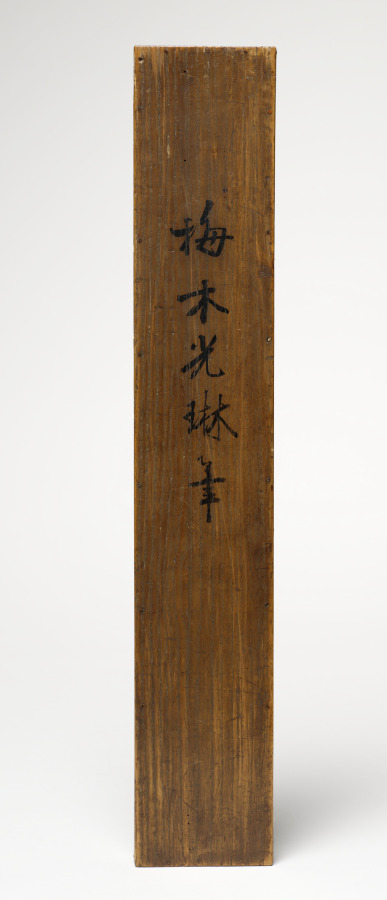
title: Plum Tree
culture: Japan, Edo period (1615–1868)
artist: Ogata Kōrin (Japanese, 1658–1716)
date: c. 1700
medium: hanging scroll; ink on silk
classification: Painting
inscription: Artist's signature and seal above hillock bottom right corner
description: Ogata Kōrin had to think through his design carefully to create these white plum blossoms and deliver their effect, as he used the reserve technique—where selected areas of the painting surface are left unpainted—to achieve it. He probably roughed in the tree before applying an ink wash to the entire silk surface, except where he intended to place the flowers. He likely then returned to articulate the petals and, in some cases, the pistils and stamens. The composition shows the tree twisting out of view, only to return with a branch of new growth jabbing forth from an old, broken limb, thereby heightening the visual impact of the blossoms.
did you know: The Rinpa style of painting is named for Ogata Kōrin, even though he did not create it.